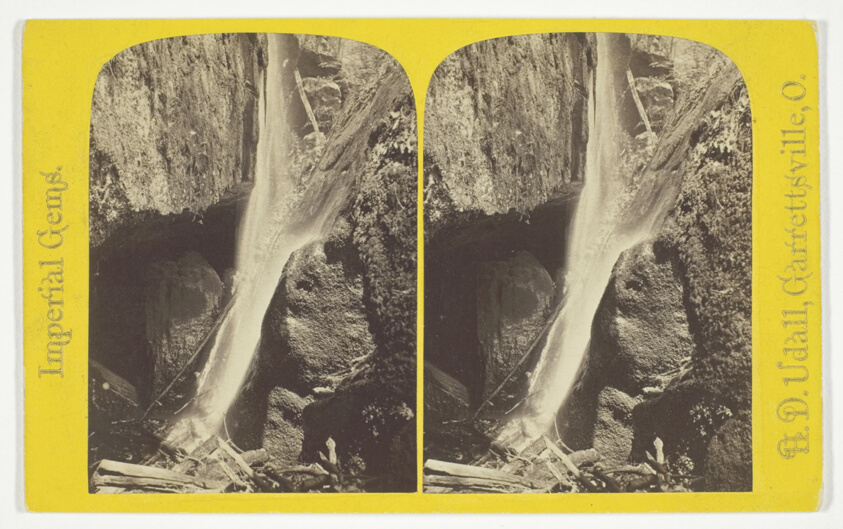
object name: Photograph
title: Nourmahal Cascade, and Gold Hunter's Cave, No. 12 from the series "Imperial Gems", No. 12 from the series "Imperial Gems"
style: 19th century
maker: H. D. Udall; American, active late 19th century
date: 1875/99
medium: Albumen print, stereo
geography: Ohio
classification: photography; photograph